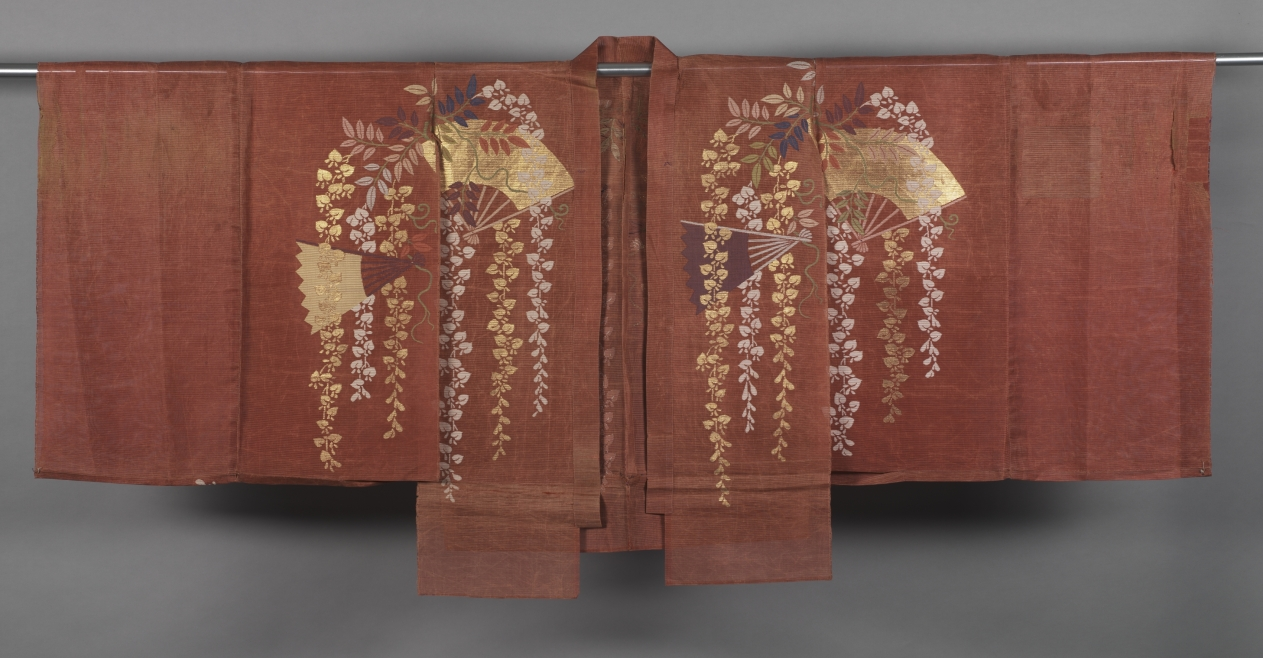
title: Noh Costume (Chōken)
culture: Japan, Edo period (1615–1868)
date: 1800–1850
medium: gauze; silk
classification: Garment